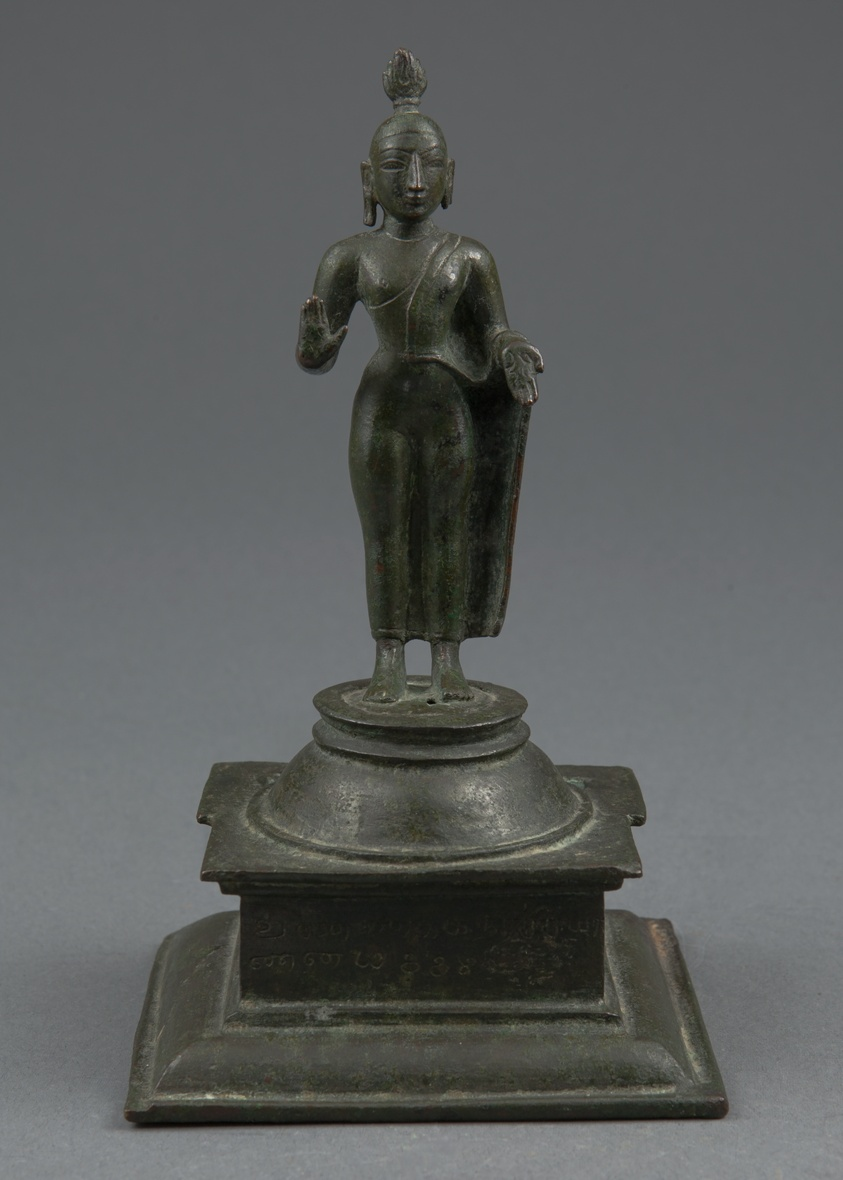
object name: Sculpture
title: Buddha with Left Hand in Gesture of Gift Giving (Varadamudra)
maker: India; Tamil Nadu, Nagapattinam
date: 16th century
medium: Bronze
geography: Tamil Nadu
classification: bronze; metal; sculpture; asian art